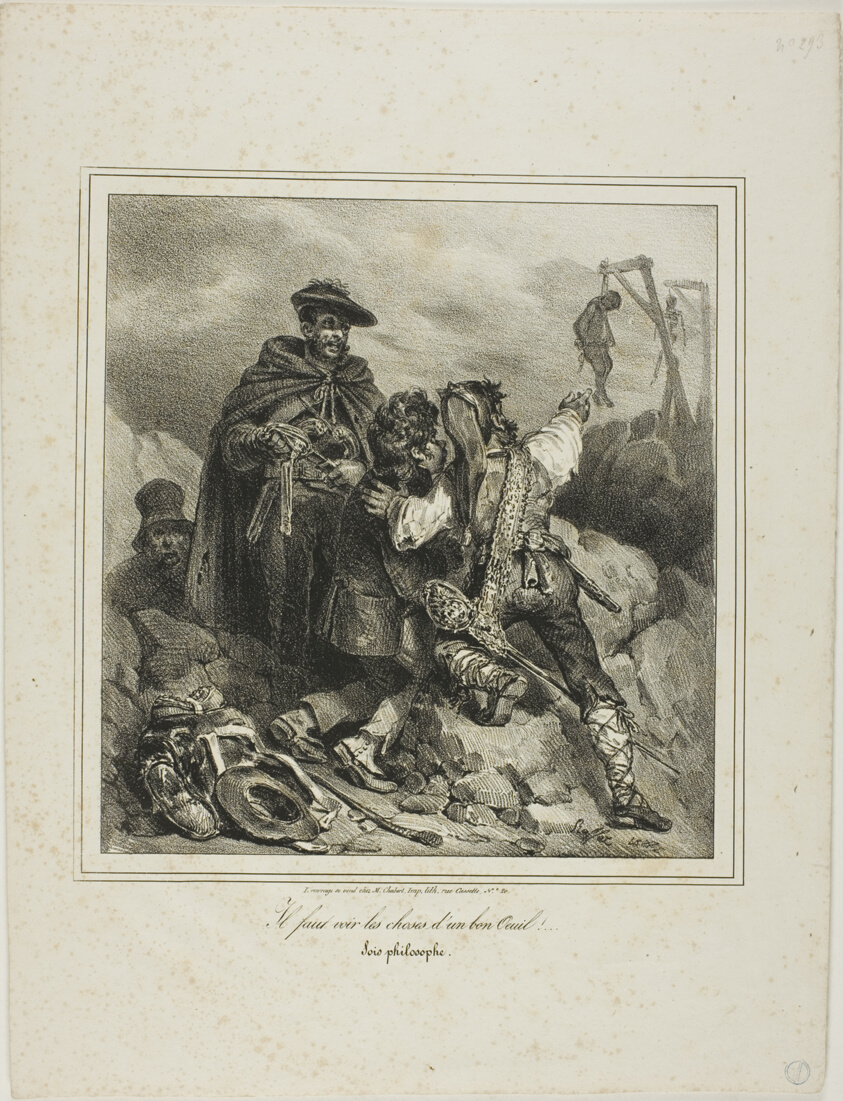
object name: Print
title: He must see things favorably!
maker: Denis Auguste Marie Raffet (French, 1804-1860)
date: 1828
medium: Lithograph in black on ivory wove paper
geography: France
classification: lithograph; print; prints and drawing